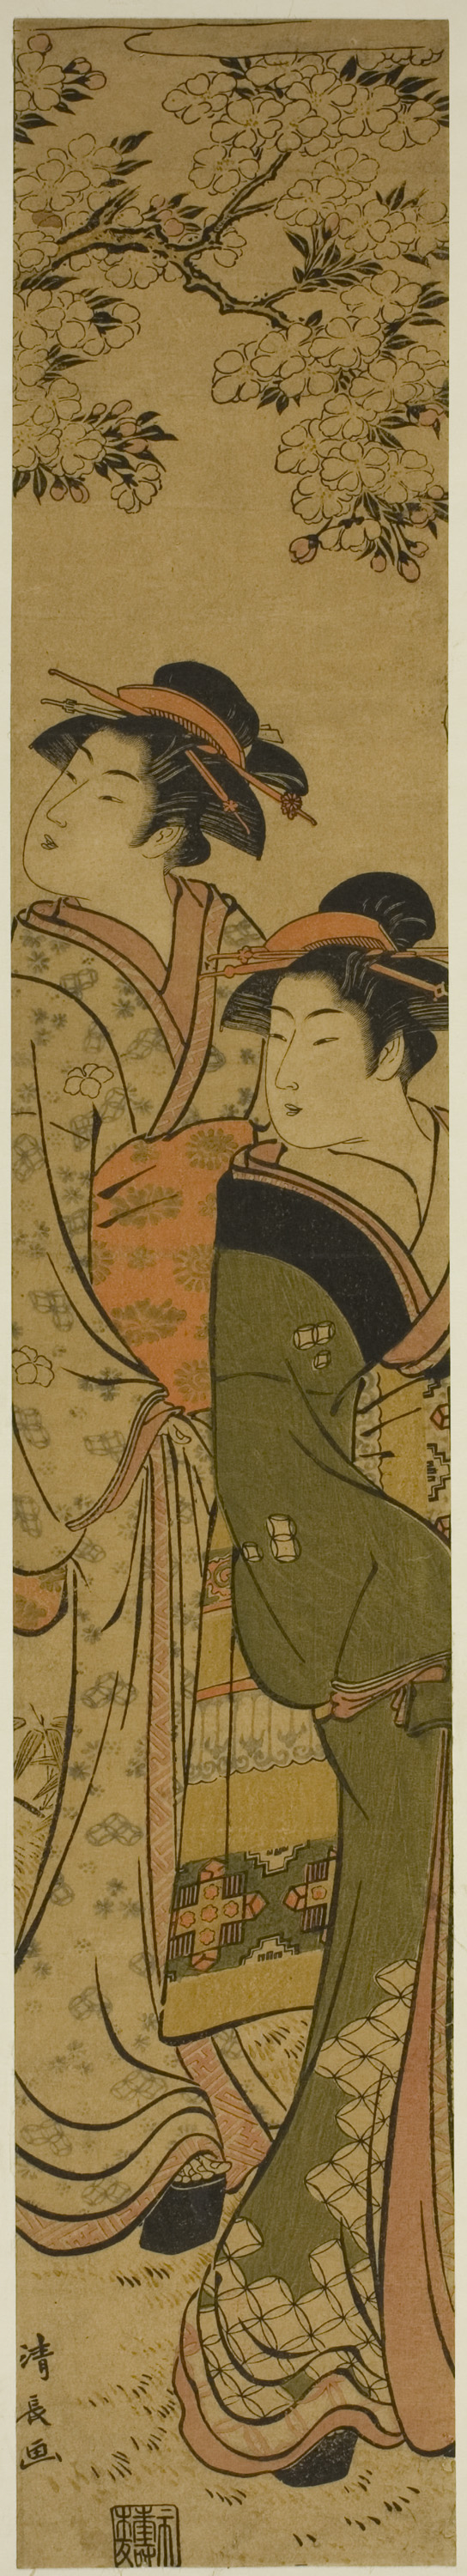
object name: Print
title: Two Geisha Walking under a Cherry Tree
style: Japanese (culture or style)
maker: Torii Kiyonaga (Japanese, 1752-1815)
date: c. 1781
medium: Color woodblock print; hashira-e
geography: Japan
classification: woodblock print; print; asian art